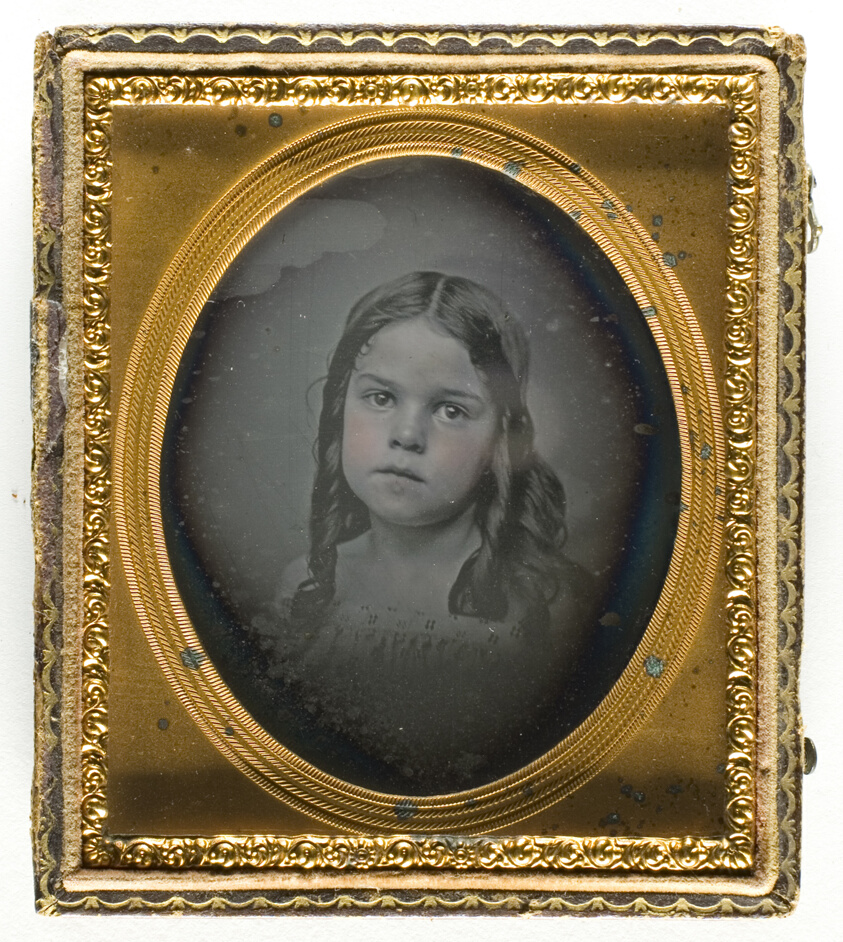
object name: Photograph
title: Untitled (Young Girl)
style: 19th century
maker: Artist unknown; 19th century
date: 1839/99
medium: Daguerreotype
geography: Unknown Place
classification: daguerreotype; photographic process; photography; photograph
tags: portraits, portraits: female subject, photography, formal portraits, portraits: child subject